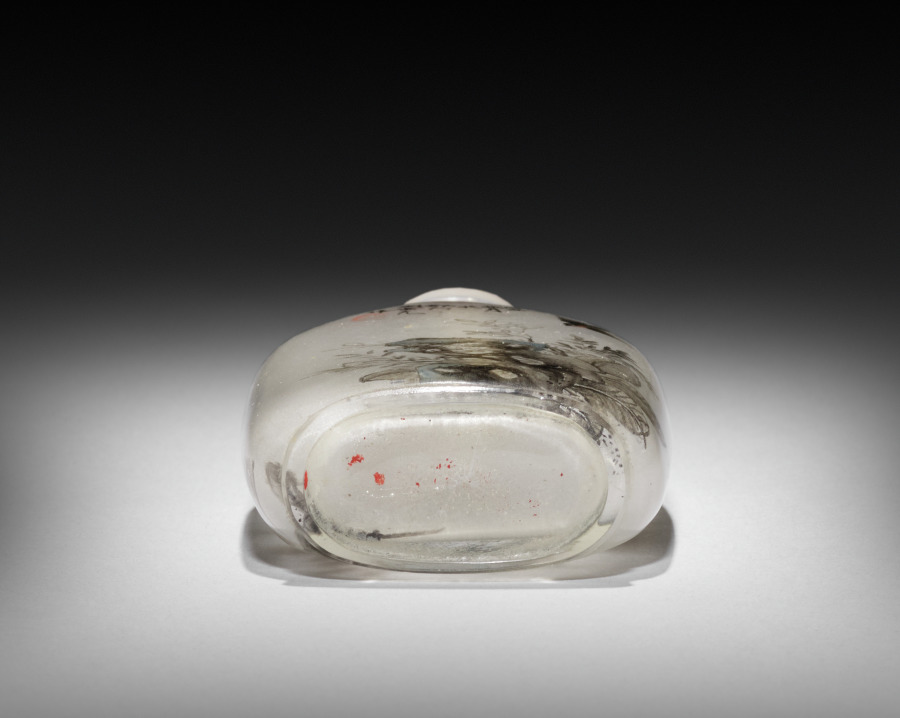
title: Snuff Bottle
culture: China, Qing dynasty (1644-1911)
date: 1644–1911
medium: glass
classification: Glass